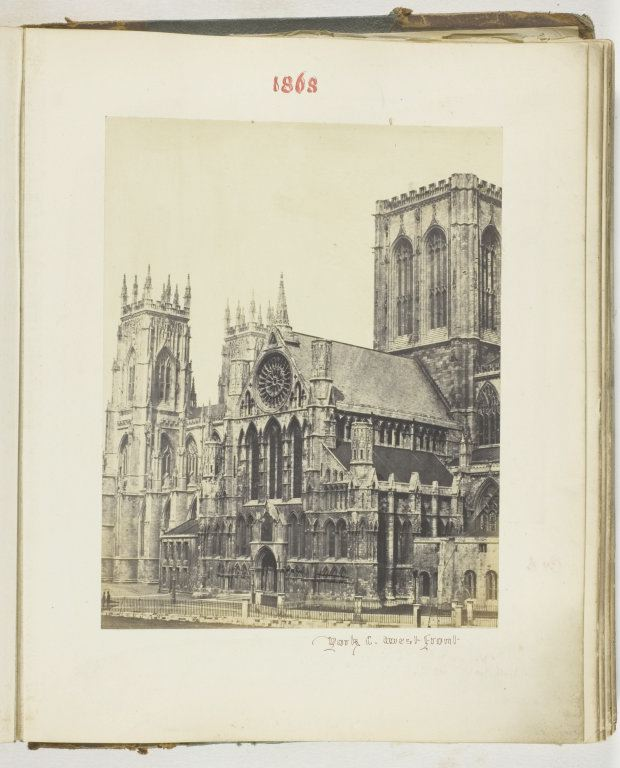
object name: Photograph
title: Untitled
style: 19th century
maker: Georgina Cowper, attributed; English, mid 19th century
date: 1855/68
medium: Albumen print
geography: England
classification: photograph; albumen silver print; photography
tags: Collected by Hugh Edwards, Untitled Album 1849-60, Auld Lang Syne